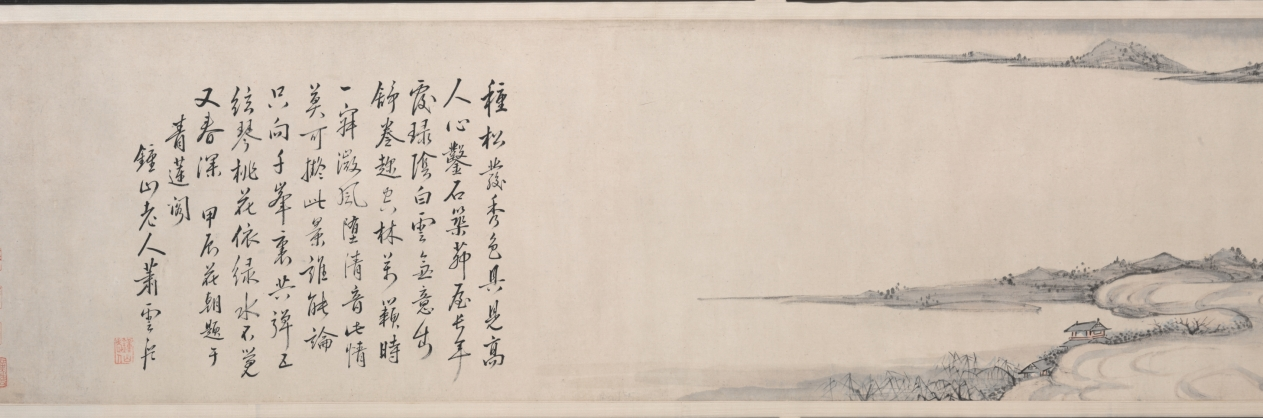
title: Pure Tones among Hills and Waters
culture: China, Qing dynasty (1644-1911)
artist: Xiao Yuncong (Chinese, 1596–1673)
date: 1664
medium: Handscroll; ink and light color on paper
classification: Painting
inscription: 種松發秀色，具是高人心。/ 鑿石築茅屋，長年覆綠陰。/ 白雲無意出，舒卷趨空林。/ 萬籟時一寂，微風墮清音。/ 此情莫可擬，此景誰能論。/ 只向千峰裏，共彈五絃琴。/ 桃花依綠水，不覺又春深。 甲辰花朝題于青蓮閣, 鐘山老人蕭雲從。[印] 鐘山老人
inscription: Title and inscription, dated 1744, and 3 seals of Shen Feng 沈鳳 (1685-1755).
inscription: 4 colophons and 24 additional seals: 1 colophon, dated 1811, and 5 seals of Xiang Yuan 項源 (active about 1811); 1 colophon, dated 1858, and 2 seals of Qi Junzao 祁寯藻 (1793-1866); 1 colophon and 4 seals of Zhang Yunzhong 張允中 (1881–1960?); 4 seals of Jiang Xun 江恂 (active about 1753–after 1780); 1 colophon dated 1943, and 2 seals of Wang Shaoming 汪兆銘 (Wang Jingwei 汪精衛, 1883–1944); 1 seal of Qi Zhiliu 祁之鏐 (active about 1858); 2 seals of Yu Zhimeng 俞芷盟 (second half of 19th century); 4 seals unidentified.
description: Painted at age 68, this landscape is one of Xiao Yuncong’s most mature works. Extraordinary in its combination of fine details with bold brushstrokes and bluish washes, it is also one of his longest compositions in handscroll format, extending over 23 feet. Throughout his lifetime, Xiao visited Nanjing and Yangzhou, where he met with other painters and literati. Regarded as the founder of the Gushu school (姑孰派) of painting, Xiao painted from nature, and his landscapes are informed by his travels, as well as by his experience as a print designer.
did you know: Biographical notes on Xiao Yuncong relate that he did not pursue the career of an official, but "furnished a cottage in the eastern suburbs [of Wuhu in Anhui province] and amused himself playing the qin (zither) and reading every day."